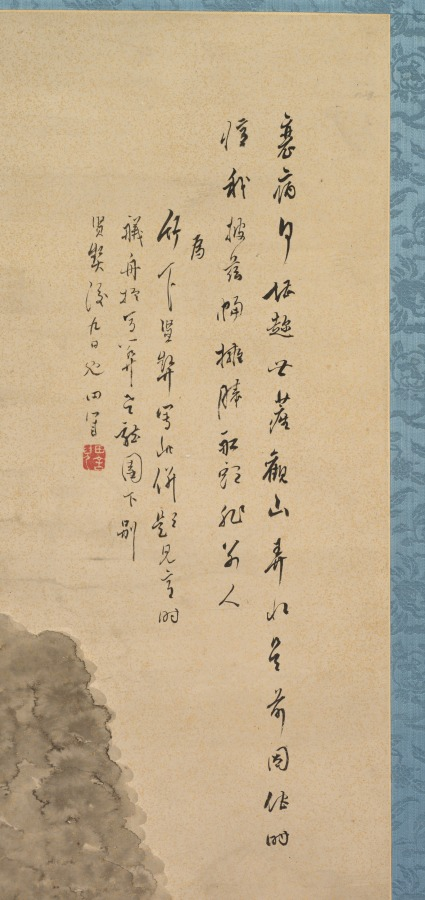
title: Mountain View and Blue Water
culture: Japan, Edo period (1615–1868)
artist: Tanomura Chikuden (Japanese, 1777–1835)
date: early 1800s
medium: hanging scroll; ink, color, and gold on paper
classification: Painting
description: Tanomura Chikuden was an eminent painter whose adopted son, Tanomura Chokunyū (1814–1907), was Seifū Yohei III’s painting teacher. This work was displayed at a gathering commemorating the 10th anniversary of Chokunyū’s death, something we know only because its custom-made box and archival documents have been carefully kept together. The box inscription also confirms that Chikuden was emulating the style of the Mi family of painters, active during China’s Southern Song dynasty (1127–1279). The painting’s Chinese-style silk wrapper is inscribed and sealed on its interior by members of Chokunyū’s community.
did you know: The mountain shapes are built up with multiple small wet strokes.